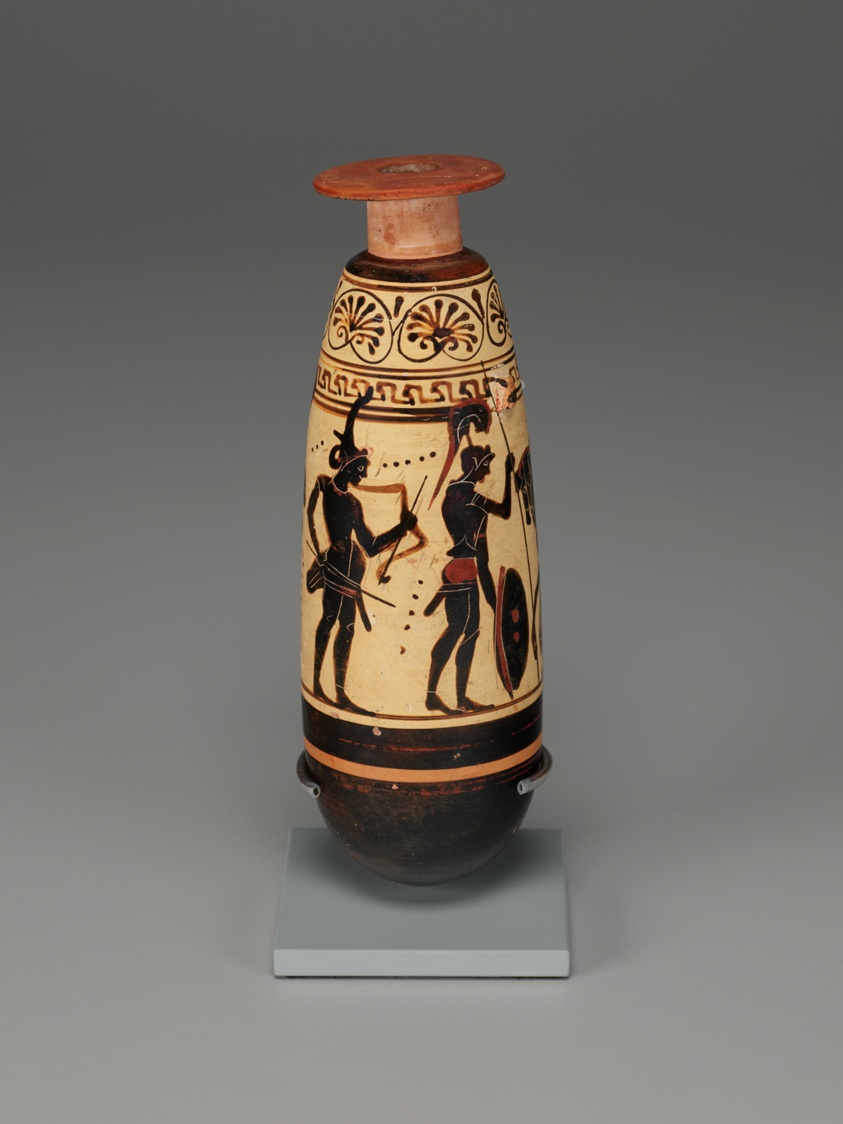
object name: Vessel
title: Alabastron (Container for Scented Oil)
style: archaic (greek), attic, ancient, greek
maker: Attributed to the Diosphos Painter; Greek; Athens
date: about 500-480 BCE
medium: terracotta, black-figure on white ground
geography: Athens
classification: vessel; ancient art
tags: mythology, beauty, rituals